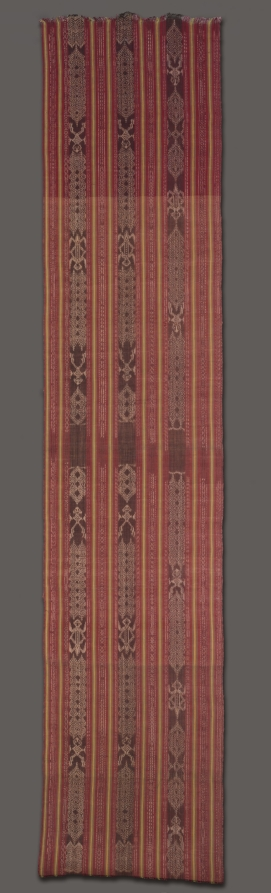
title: Mandaya textile (composite dagmay)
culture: Philippines, Mindanao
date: c. early 1900s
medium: plain weave hemp, dyed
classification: Textile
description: This textile strikingly fuses two different weaving traditions and materials: abacá ikat (dagmay) for the patterned sections, and commercially or locally dyed cotton for the plain-weave intervals. This combination is an inventive Mandaya solution for creating a cloth that retains ritual meaning through its abacá ikat components, while achieving comfort, flexibility, and drape through the inclusion of cotton.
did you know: Abacá, a banana fiber, is associated with protection, balance, and the presence of umagad (ancestral spirits).